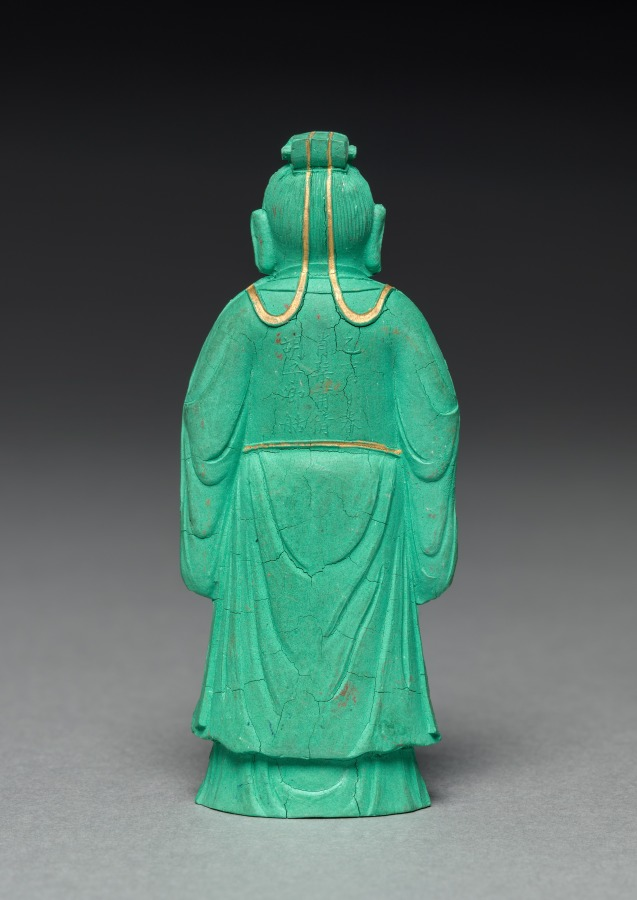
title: Ink Cake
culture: China, Qing dynasty (1644-1911)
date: late 19th Century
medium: ink cake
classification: Miscellaneous